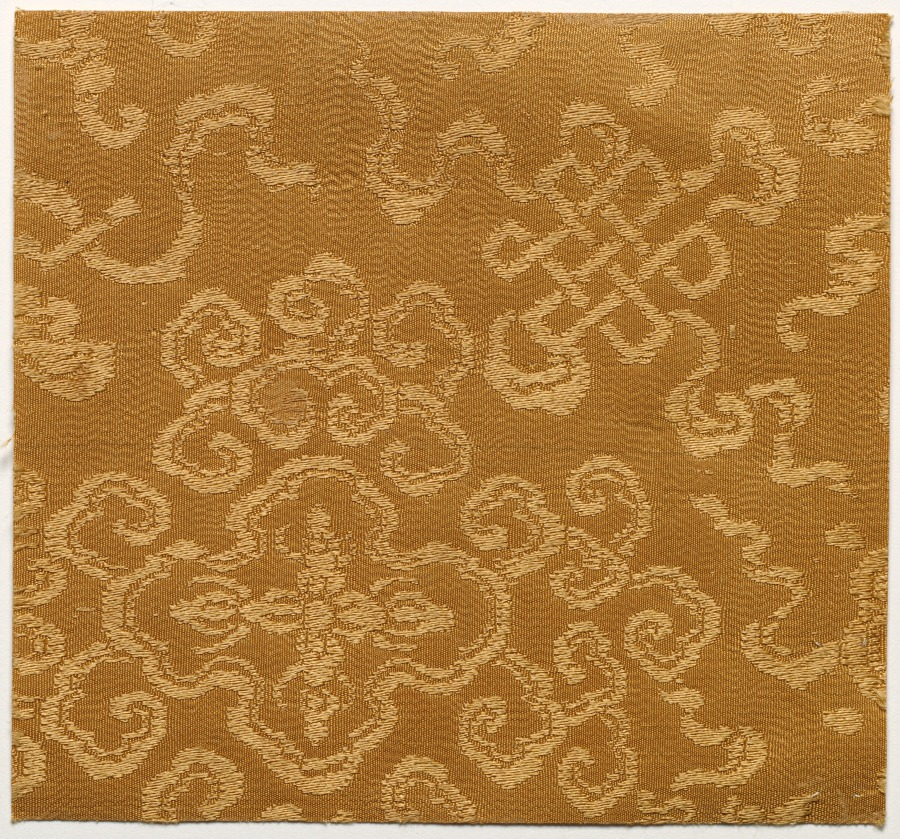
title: Textile Fragment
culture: Japan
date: 1800s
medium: silk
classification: Textile